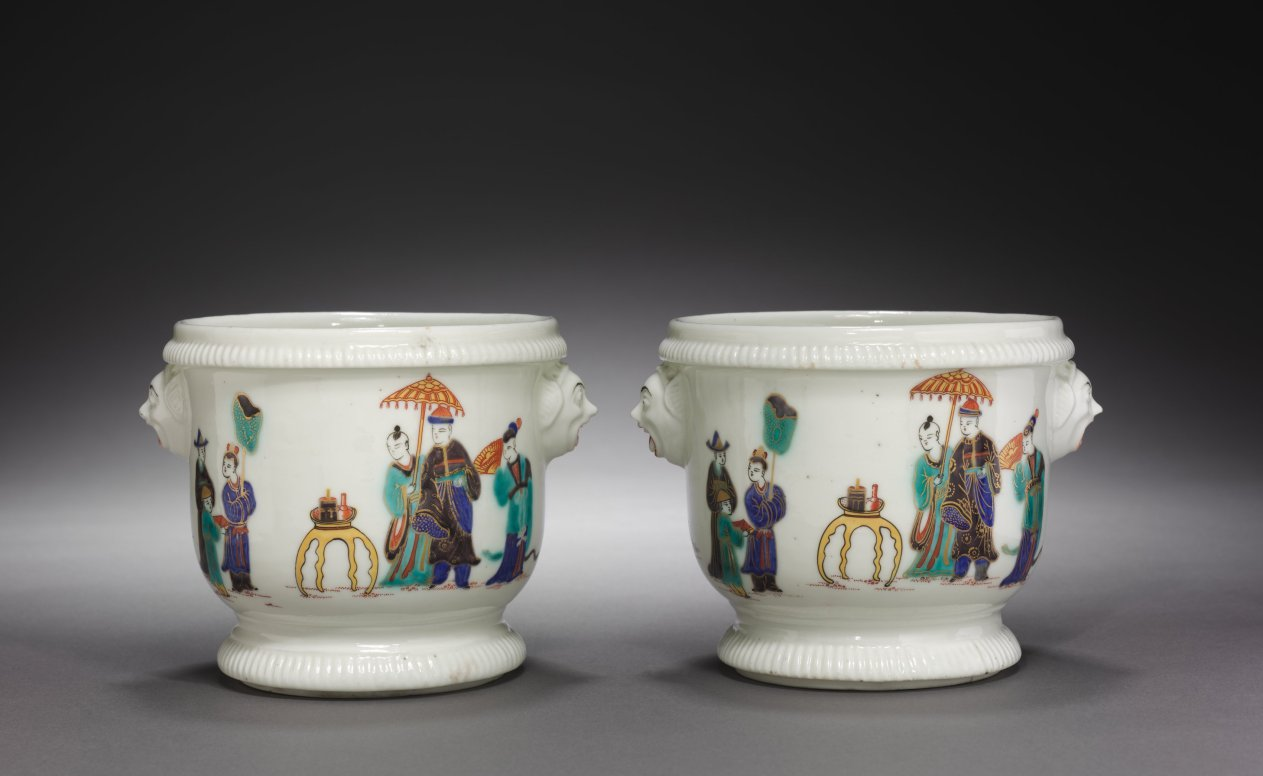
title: Pair of Bottle Coolers (Seaux à rafraîchir)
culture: France, Saint Cloud, 18th century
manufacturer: Saint Cloud Porcelain Factory (French)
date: c. 1730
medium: soft-paste porcelain with enamel and gilt decoration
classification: Ceramic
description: The Saint-Cloud Porcelain Factory was known for its innovation in color. Shades of green and blue are used to paint the main decoration of these bottle coolers, a palette typical of the Chinese porcelain famille verte. The alternating red and gold outlines of the figures and objects is relatively rare and generally only seen on two shapes produced at Saint-Cloud, bottle coolers and cream pots.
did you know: These bottle coolers would have been used to cool glasses or small bottles.